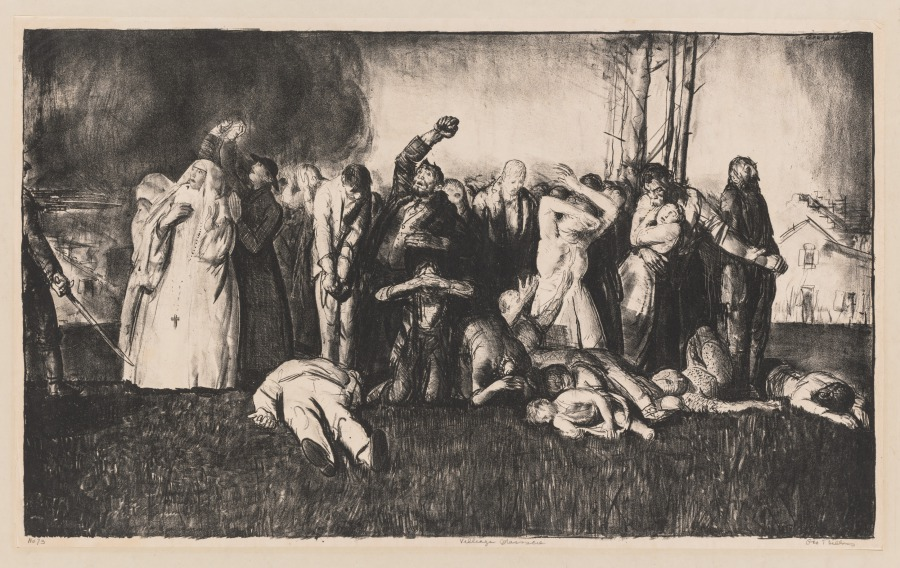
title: Massacre at Dinant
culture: America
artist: George Bellows (American, 1882–1925)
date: 1918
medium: lithograph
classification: Print